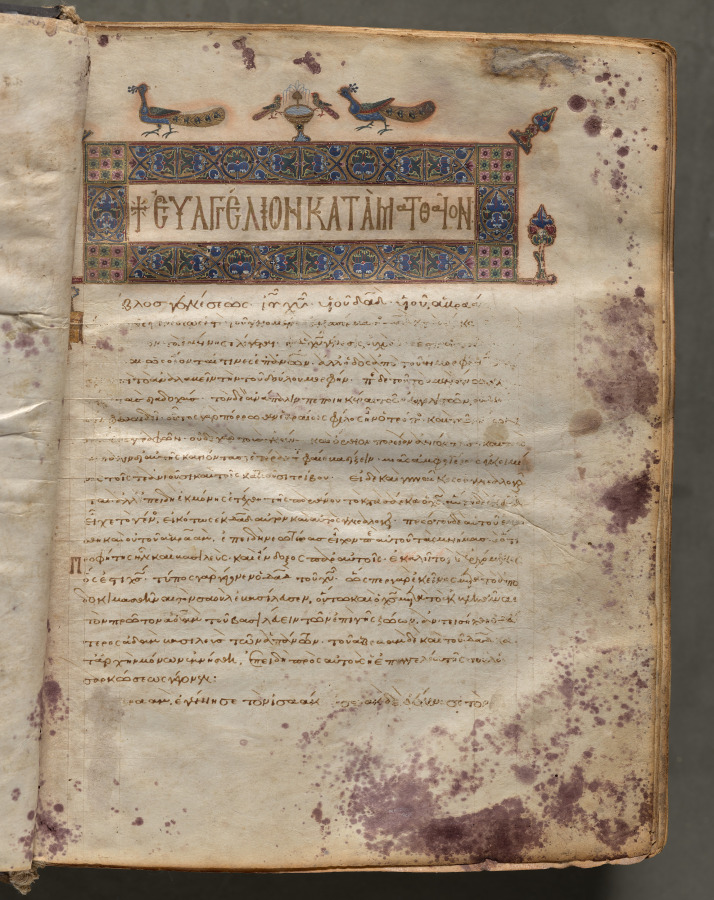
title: Portrait of Matthew, folio 6 (recto), from a Gospel Book with Commentaries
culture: Byzantium, Constantinople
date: c. 1000–1100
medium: ink, tempera, and gold on vellum; leather binding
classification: Bound Volume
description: Each of the four gospels in this book opens on a page with brilliantly illuminated borders depicting the author of the text as well as birds-principally peacocks, symbols of the immortality of the soul-and fountains, representing the fountain of life and the salvation of the soul. This volume consists of 428 leaves with texts in Greek. Its level of sophistication suggests that it was probably written and decorated in a monastery in Constantinople.